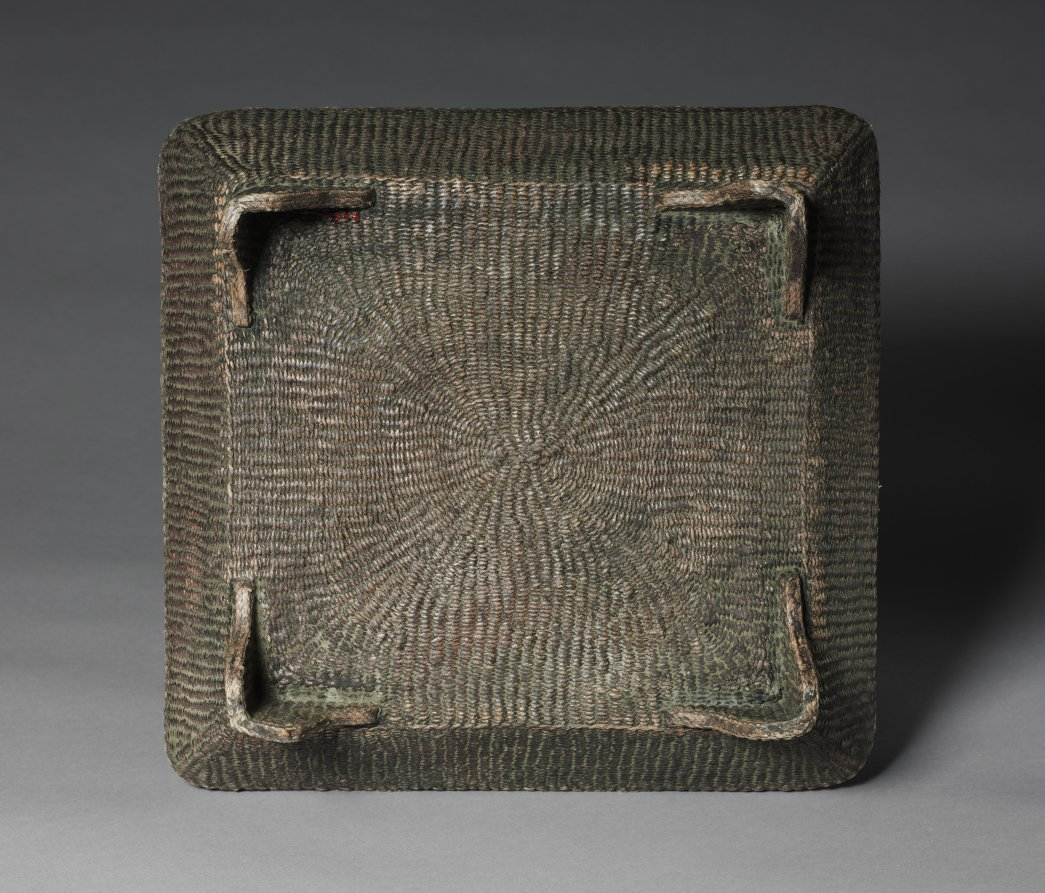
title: Footed Tray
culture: Korea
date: 1900s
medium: lacquer over twisted and coiled paper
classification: Lacquer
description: In Korea, paper has been widely used since the 1800s for constructing stationery and storage boxes, as well as for paraphernalia for the scholar's studio. This tray's modest appearance belies both the laborious process involved in its construction and its status in Korea as an object for the scholar's desk.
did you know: The artist first cords and twines paper before constructing a desired shape.